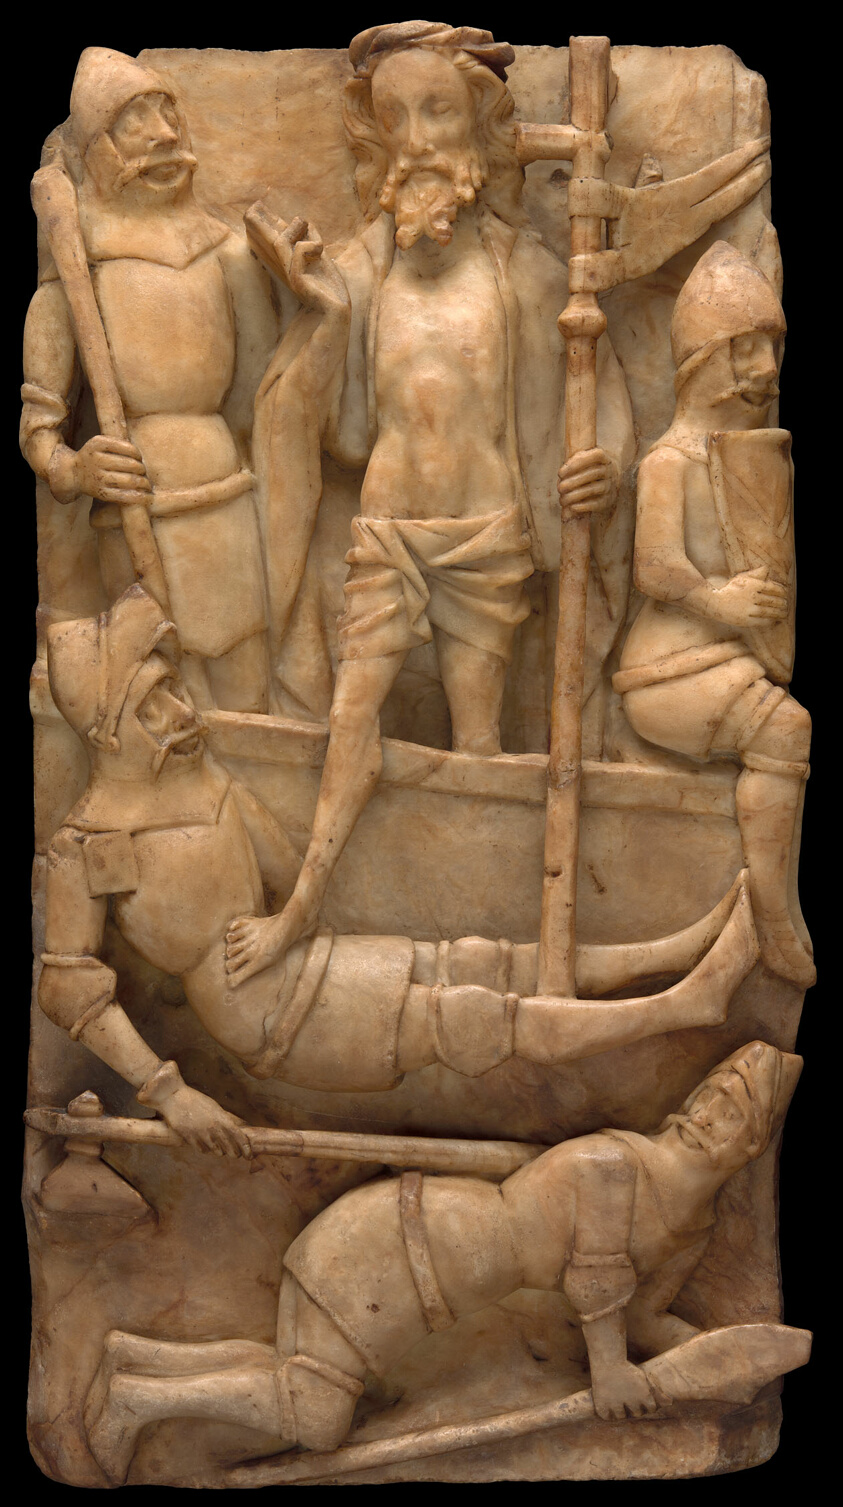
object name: Sculpture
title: The Resurrection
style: 15th century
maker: English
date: 15th century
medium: Alabaster, traces of polychromy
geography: England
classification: relief; sculpture; british; paint; alabastron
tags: resurrection scenes, armor, Christian subjects, Christianity, helmets, Jesus, men, religion, religious, religious figures, religious scenes, shields, sleep, soldiers, tombs, weapons